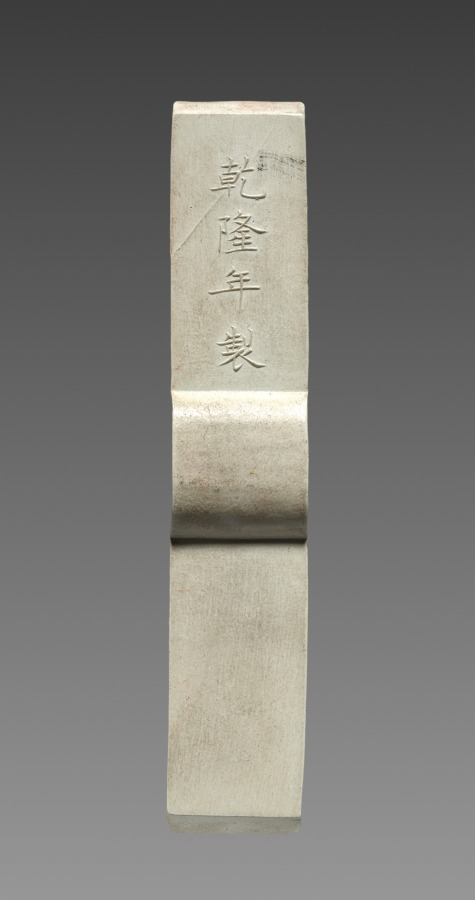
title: Ink Stick from an Imperially Commissioned Set of Ink Stick with Images and Poems of Famous West Lake Sites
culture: China, Qing dynasty (1644–1911), Qianlong reign (1736–95)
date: 1780–94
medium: Molded ink in white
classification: Miscellaneous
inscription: 乾隆年製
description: This is one of ten ink cakes of different shapes and colors stored in an exquisite lacquer box. Each is inscribed in gold with a poem by the Qianlong emperor, praising the ten famous sights of the Westlake in Hangzhou, near Shanghai. The Westlake is famous for its natural beauty; it was a favorite imperial destination and remains a tourist attraction today. Ink cakes (also called ink sticks) are dissolved with the addition of water and ground on the surface of a flat stone into liquid ink for painting and calligraphy. The precious ink cakes here, however, have never been used.